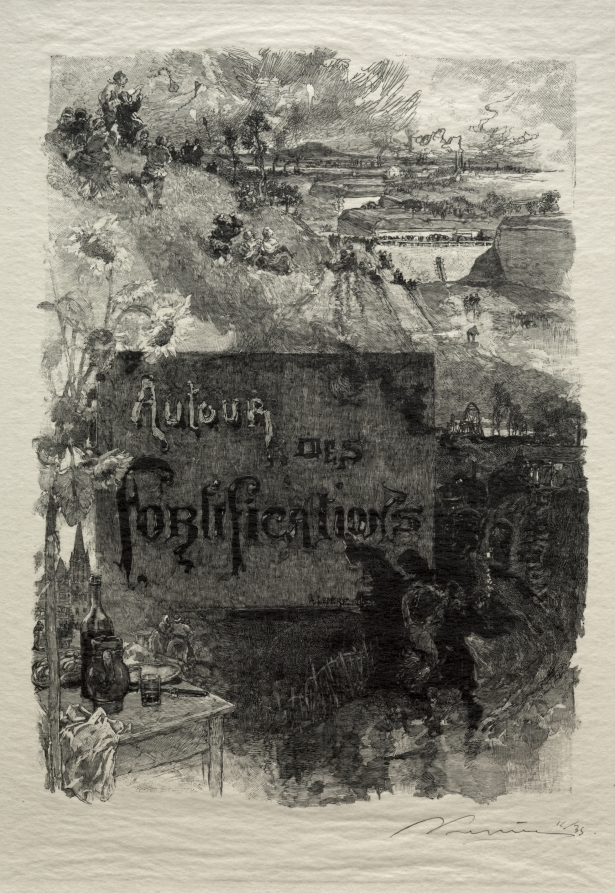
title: Frontispiece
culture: France, 19th century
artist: Auguste Louis Lepère (French, 1849–1918)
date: 1886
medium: wood engraving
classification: Print